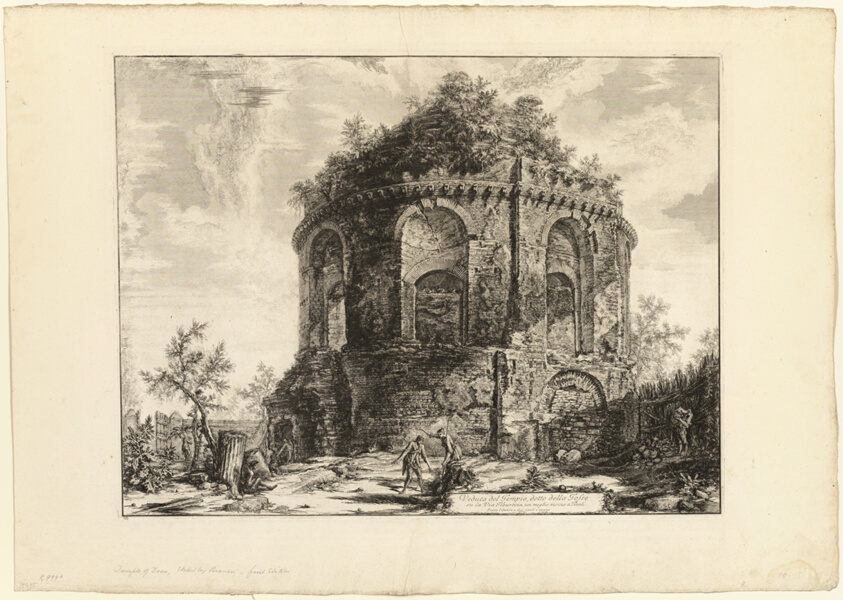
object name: Print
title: View of the So-Called Tempio della Tosse (Temple of the Cough) on the Via Tiburtina a mile from Tivoli, from Views of Rome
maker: Giovanni Battista Piranesi (Italian, 1720-1778)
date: 1763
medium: Etching on heavy ivory laid paper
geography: Italy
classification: etching; print; prints and drawing